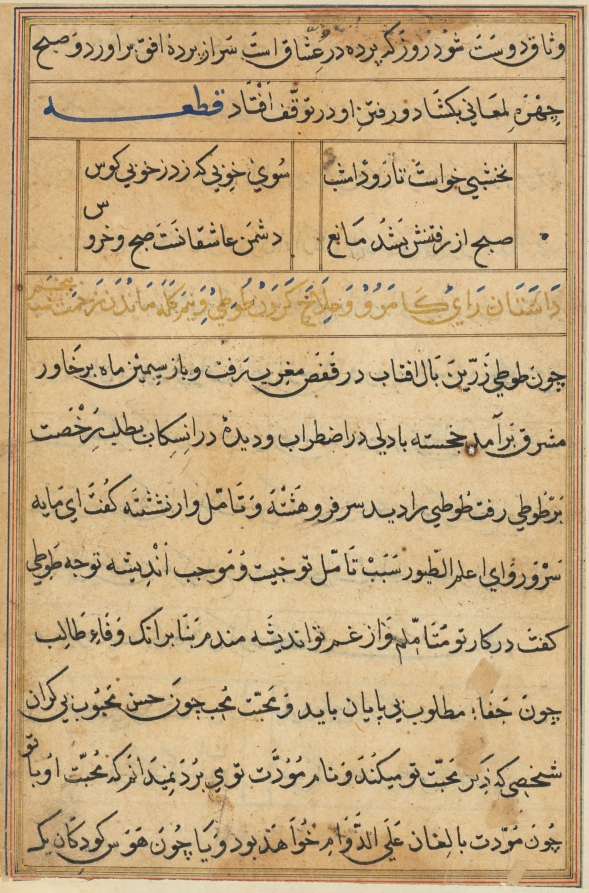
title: Page from Tales of a Parrot (Tuti-nama): text page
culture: Mughal India, court of Akbar (reigned 1556–1605)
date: c. 1560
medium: gum tempera, ink, and gold on paper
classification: Painting